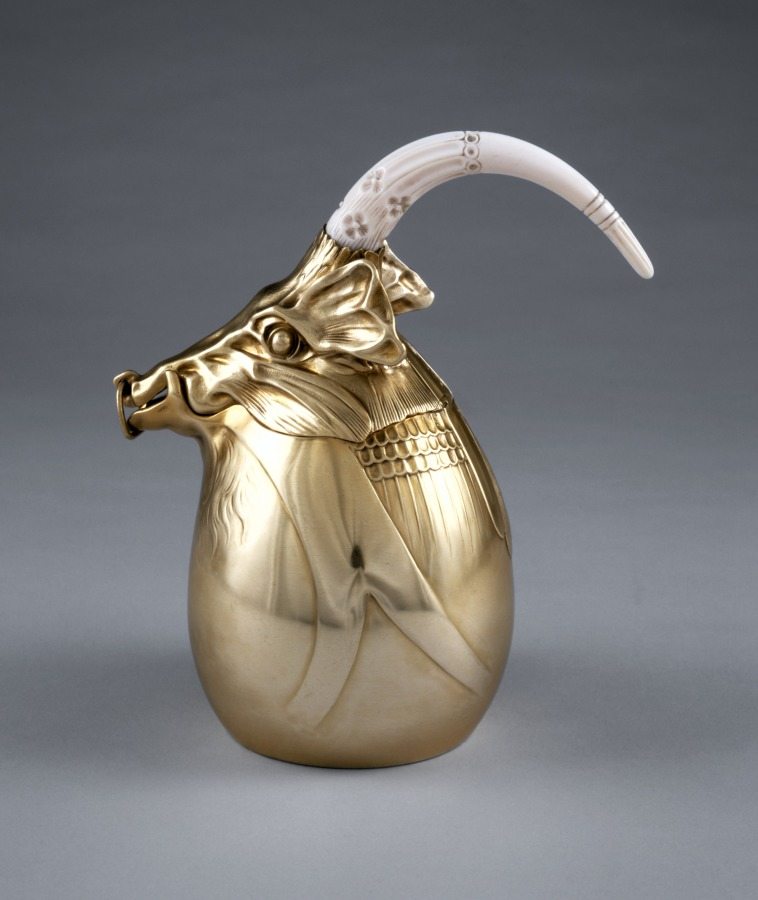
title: Tea Pot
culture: France, Paris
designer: Carlo Bugatti (Italian, 1856–1940)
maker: Adrien-Aurélien Hebrard (French, 1866–1937)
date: c. 1907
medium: Gilt silver and ivory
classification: Silver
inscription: Made by A. A. Hebrard Firm, Paris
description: This tea and coffee service, salver, and table, together with some now missing cups, were all designed by Carlo Bugatti as an ensemble and presented at the 1902 exposition devoted to decorative arts in Turin, Italy. The set was probably acquired from Bugatti's 1907 exhibition at the Galerie Hébrard in Paris by a wealthy South African widow, Anna Blake, who was living there at the time. Some of the animal and insect motifs suggest mythical beasts or the fossils of prehistoric animals. When Mrs. Blake returned to Cape Town, she took these and other pieces designed by Bugatti with her, and they remained in South Africa throughout her lifetime.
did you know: This tea pot is part of a tea and coffee service designed by Carlo Bugatti.